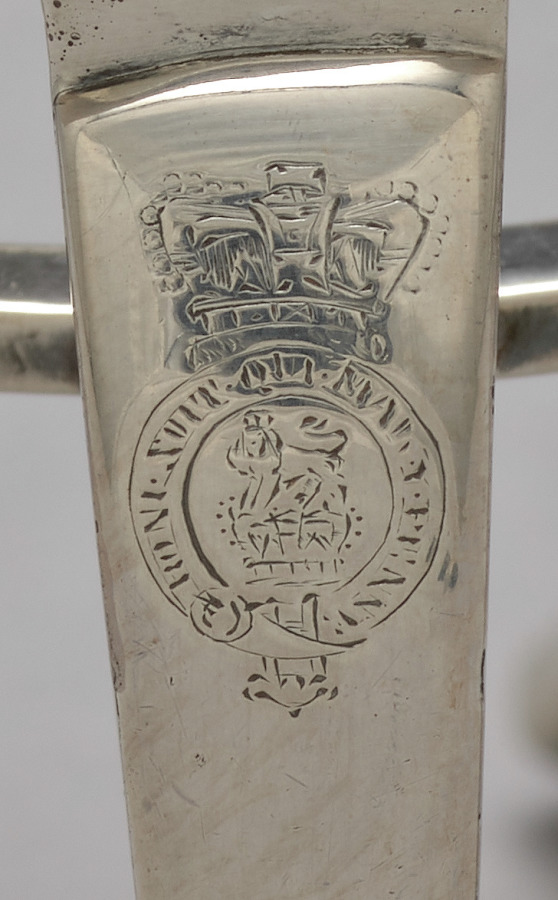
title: Stand for a Hot Water Jug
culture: England, early 19th century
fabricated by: John (British) Edwards (British)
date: 1800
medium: silver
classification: Silver